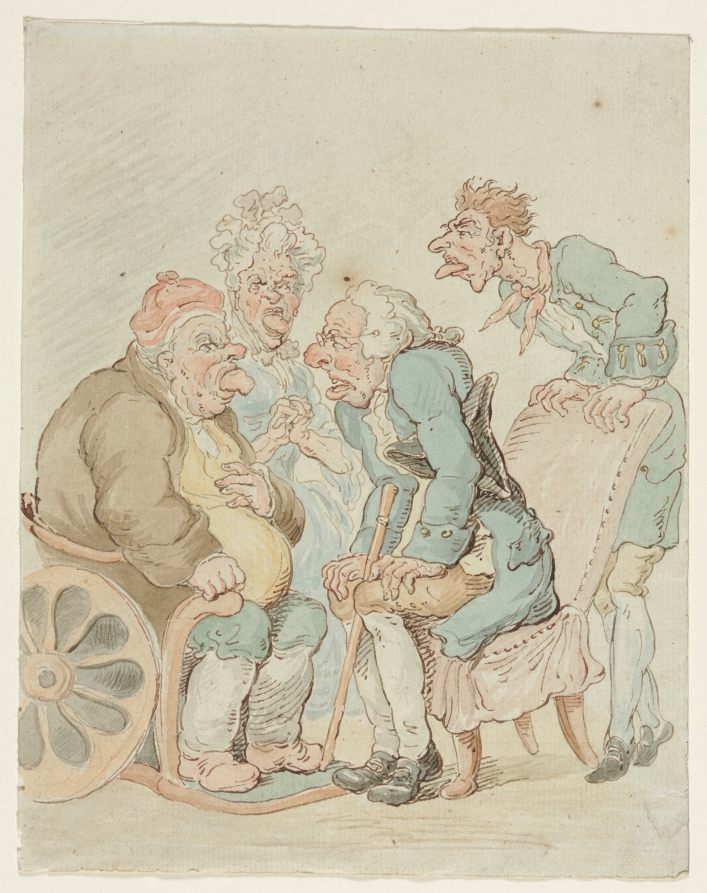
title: Doctor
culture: England, late 19th or early 20th century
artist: imitator of Thomas Rowlandson (British, 1756–1827)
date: late 1800s or early 1900s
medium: pen and brown ink with watercolor wash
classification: Drawing